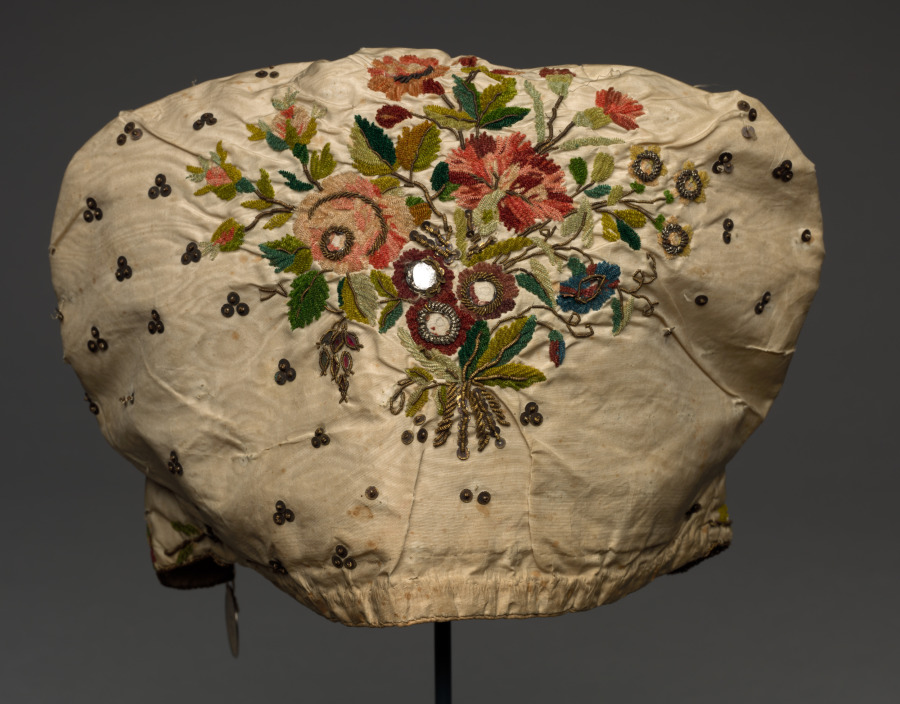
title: Headdress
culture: France, 18th century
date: 1700s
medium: silk, metallic thread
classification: Garment